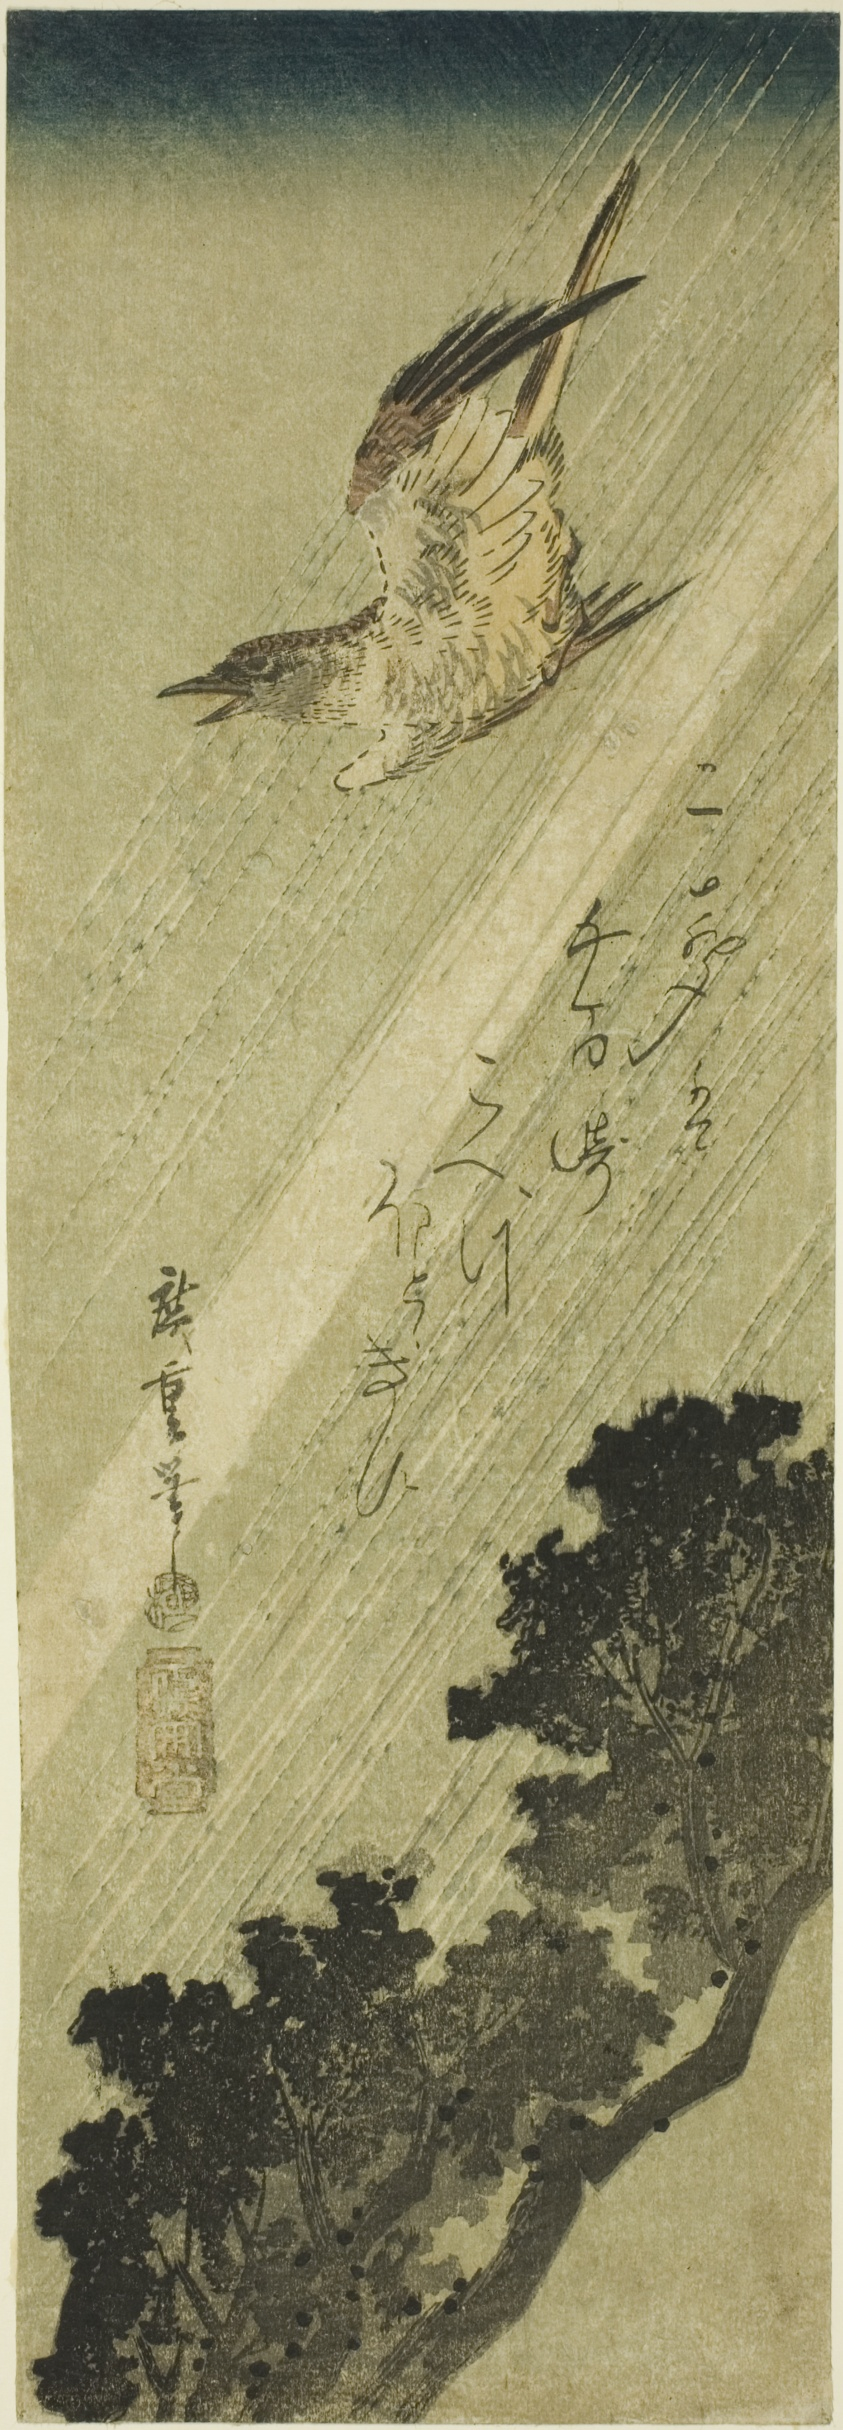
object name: Print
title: Cuckoo flying in rain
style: Japanese (culture or style)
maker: Utagawa Hiroshige 歌川 広重; Japanese, 1797-1858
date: early 1830s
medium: Color woodblock print; chutanzaku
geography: Japan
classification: woodblock print; print; asian art